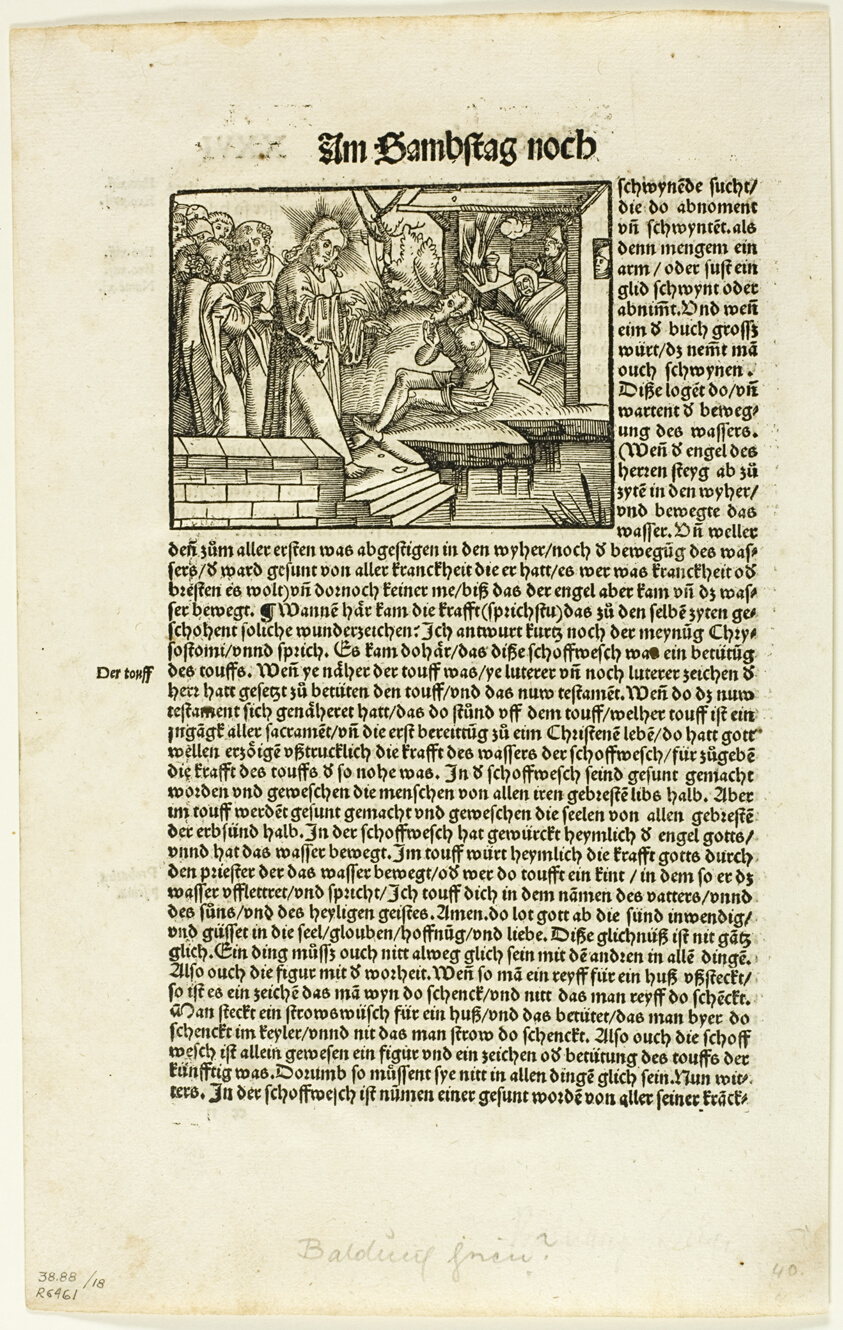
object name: Print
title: Illustration from Das Buch der Evangelien, plate eighteen from Woodcuts from Books of the XVI Century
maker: Unknown Artist (German, 16th century); assembled by Max Geisberg (Swiss, 1875-1943)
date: 1515, assembled into portfolio 1937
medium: Woodcut on paper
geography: Germany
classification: woodcut; print; prints and drawing